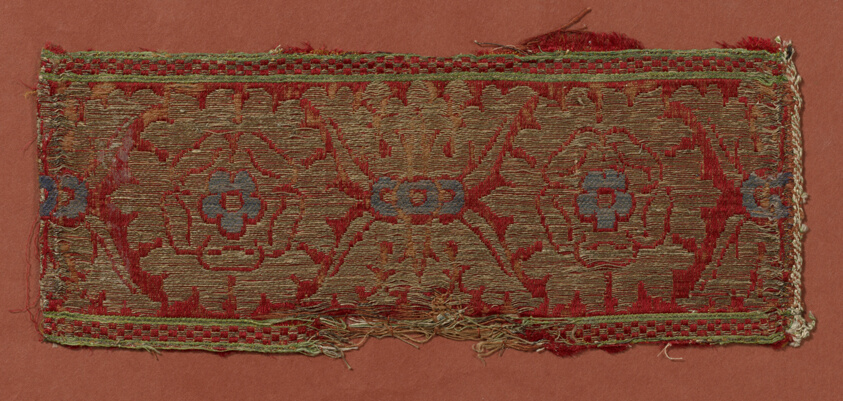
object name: Textile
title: Border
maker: Italy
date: 15th century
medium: Silk, gold gilt strip wound around linen fiber core, warp-float faced satin weave with supplementary patterning wefts tied by supplementary binding warps in twill interlacing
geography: Italy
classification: textile; weaving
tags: flowers